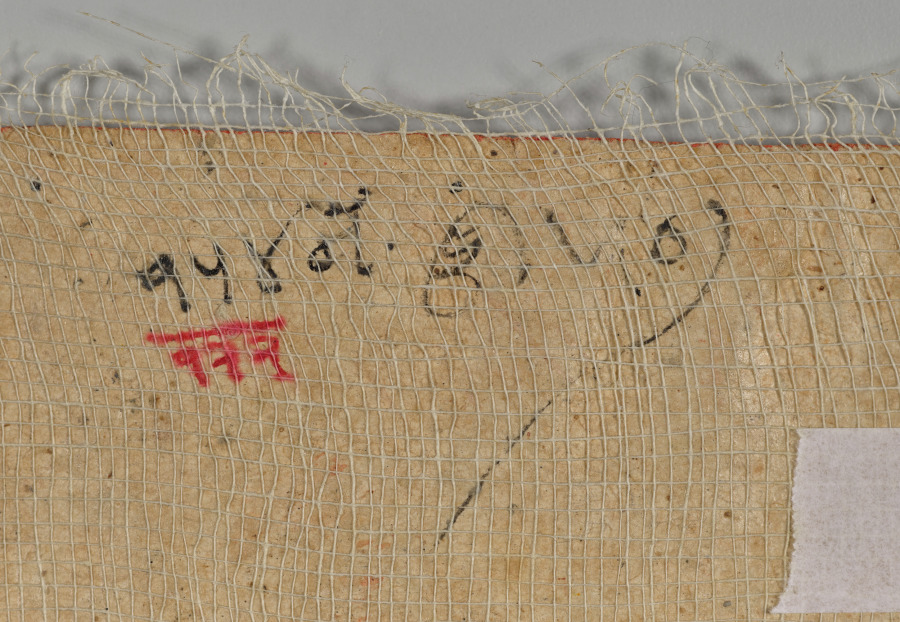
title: Maharana Jagat Singh Attending the Raslila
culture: Northwestern India, Rajasthan, Mewar, Udaipur, 18th century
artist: attributed to Jai Ram (Indian, active 1710–40)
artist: and/or Jiva (Indian, active mid-1700s)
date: 1736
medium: Gum tempera, gold, and silver on paper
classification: Painting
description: To celebrate the New Year festival of Diwali, dancers reenact the life story of the Hindu god Krishna in a palace courtyard by candlelight under the full moon. The king, a vassal of the Mughal emperor, sits with the halo of divine sanction for his rule at the left of the courtyard, smoking from a golden goat-shaped hookah, with his young son and heir at his side. At the top of the composition, a dancer dressed in blue with a peacock-feather crown plays the part of Krishna. In the upper right corner, a canopy painted with swirling storm clouds stands for the rainstorm sent by the jealous king of the gods, who is shown in the middle of the canopy with his consort and mount, the elephant with seven trunks. Guards and grooms in the foreground entertain themselves with music while they wait with the horses of visiting nobles. The formal geometric gardens, playful use of perspective, and individualized portraiture indicate the selective adoption of the styles and sensibilities of the imperial Mughal court in the paintings from this large-format series.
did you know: This painting is one of a set of eight.